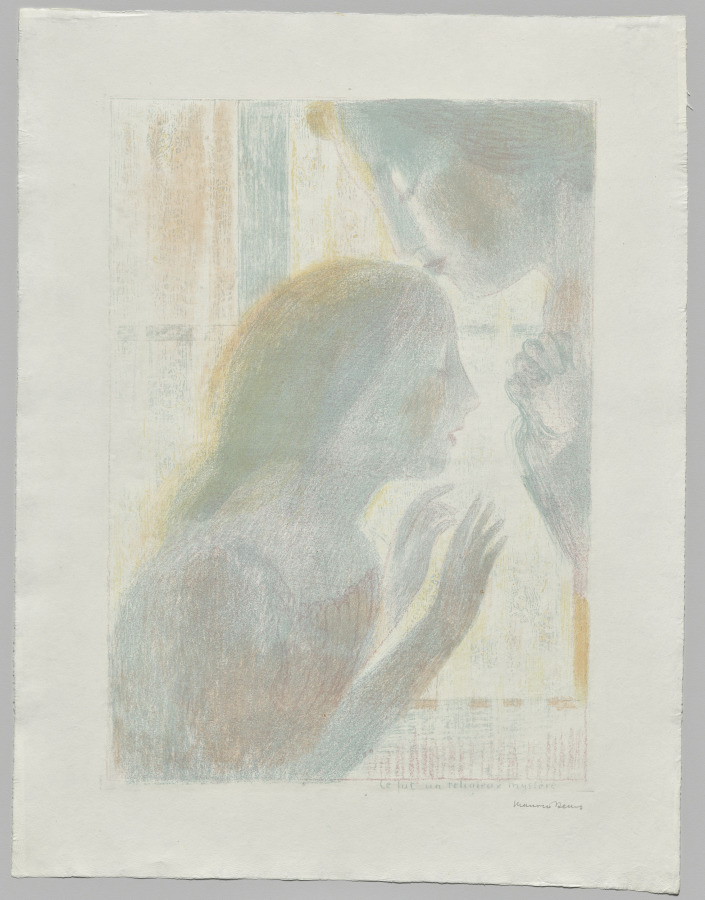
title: It Was a Religious Mystery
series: Love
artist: Maurice Denis (French, 1870–1943)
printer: August Clot (French, 1858–1936)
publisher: Ambroise Vollard (French, 1867–1939)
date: 1899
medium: color lithograph on wove paper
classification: Print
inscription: Recto, lower right: “Ce fut un religieux mystère”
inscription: In graphite, recto, lower right: “Maurice Denis (signed)”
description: Maurice Denis belonged to the Nabis, a group of artists who came together in 1889 to pursue a radical new style informed by subjective experience and emotion. This print is from a series in which Denis explored his devotion to his wife, Marthe, by depicting her in a variety of settings alongside titles drawn from his own journal. The vague but evocative images were meant to encourage the viewer to draw connections to the theme and meditate on its meaning.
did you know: Maurice Denis was a devout Catholic and often drew visual connections between his wife, Marthe, the subject of this print series, and the Virgin Mary.